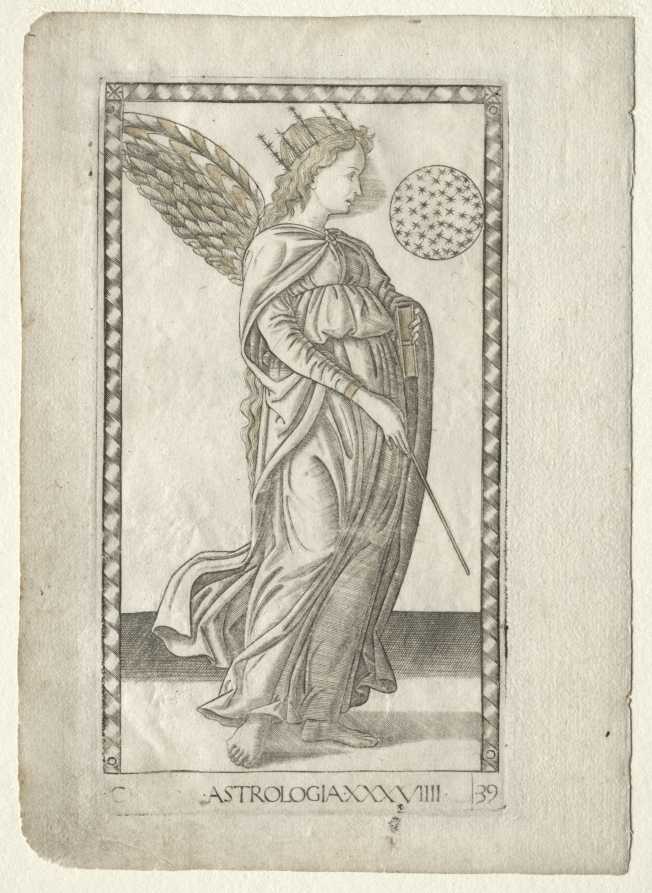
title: Astrology (from the Tarocchi, series C: Liberal Arts, #29)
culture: Italy, Ferrara, 15th century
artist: Master of the E-Series Tarocchi (Italian, active 1460s)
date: before 1467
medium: engraving, hand-colored with gold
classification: Print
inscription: Lettered below the image of Astrologia (Astrology): ·C· / ·ASTROLOGIA·XXXVIIII· / ·29·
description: This engraving is part of the group “C” named Liberal Arts. Conceptually, the liberal arts descended from classical antiquity, and were divided into the Trivium (Grammar, Rhetoric, and Dialectic or Logic) and the Quadrivium (Music, Geometry, Arithmetic, and Astronomy). In the Tarocchi set the total number was risen to ten, with the addition of the three disciplines (Poetry, Philosophy, and Theology). The liberal arts denoted knowledge or skills considered necessary to participate in a free society. By the late Middle Ages, they began to be represented in the visual arts as womanlike allegories. Here, Astrologia (Astrology) is personified as a winged and full-length female figure, in profile and turned to right. She holds a staff in her right hand, while a starry sphere hovers at the upper right. Astrology teaches the knowledge of the course, movements, and conjunctions of heavens and stars.